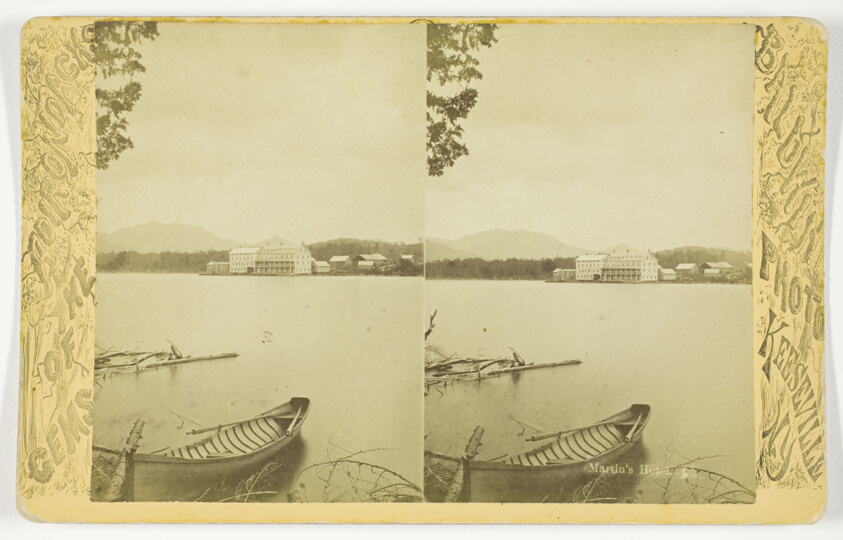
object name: Photograph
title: Martin's Hotel, from the series "Gems of the Adirondacks"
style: 19th century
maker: Baldwin Photo (American, active late 19th century)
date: Late 19th century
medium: Albumen print, stereo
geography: New York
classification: photography; photograph; albumen silver print; stereograph (albumen)